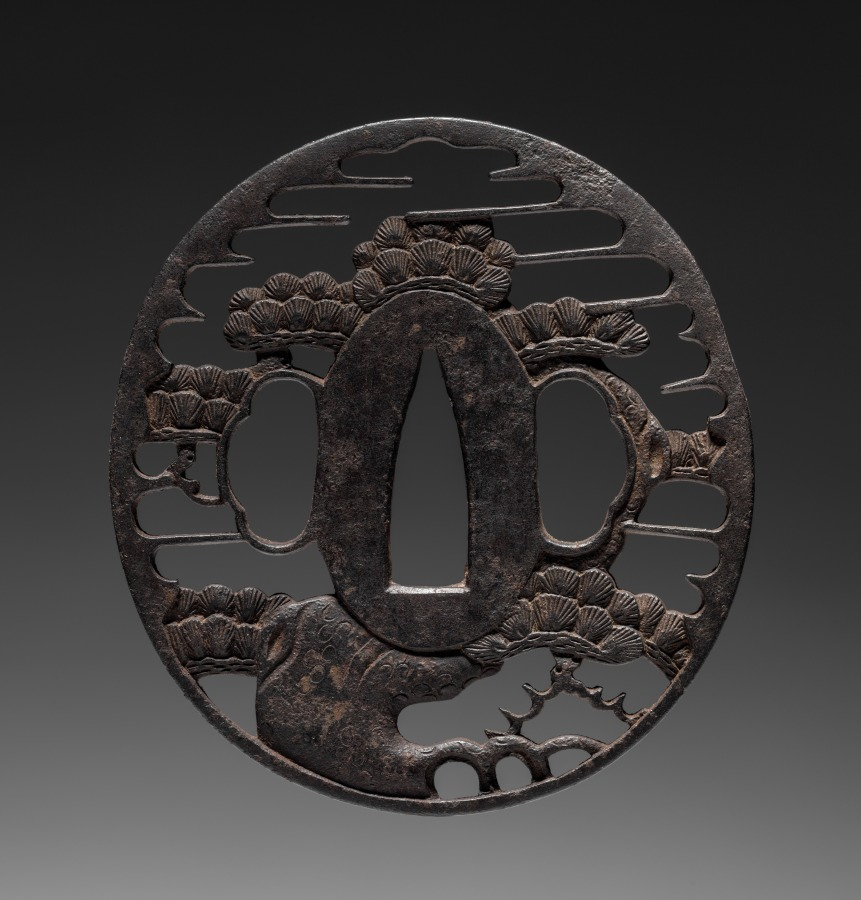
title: Sword Guard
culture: Japan, Edo period (1615–1868)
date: early 1800s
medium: iron (Akasaka type)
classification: Arms and Armor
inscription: signed "Masayoshi, residing in Musashi province, made."